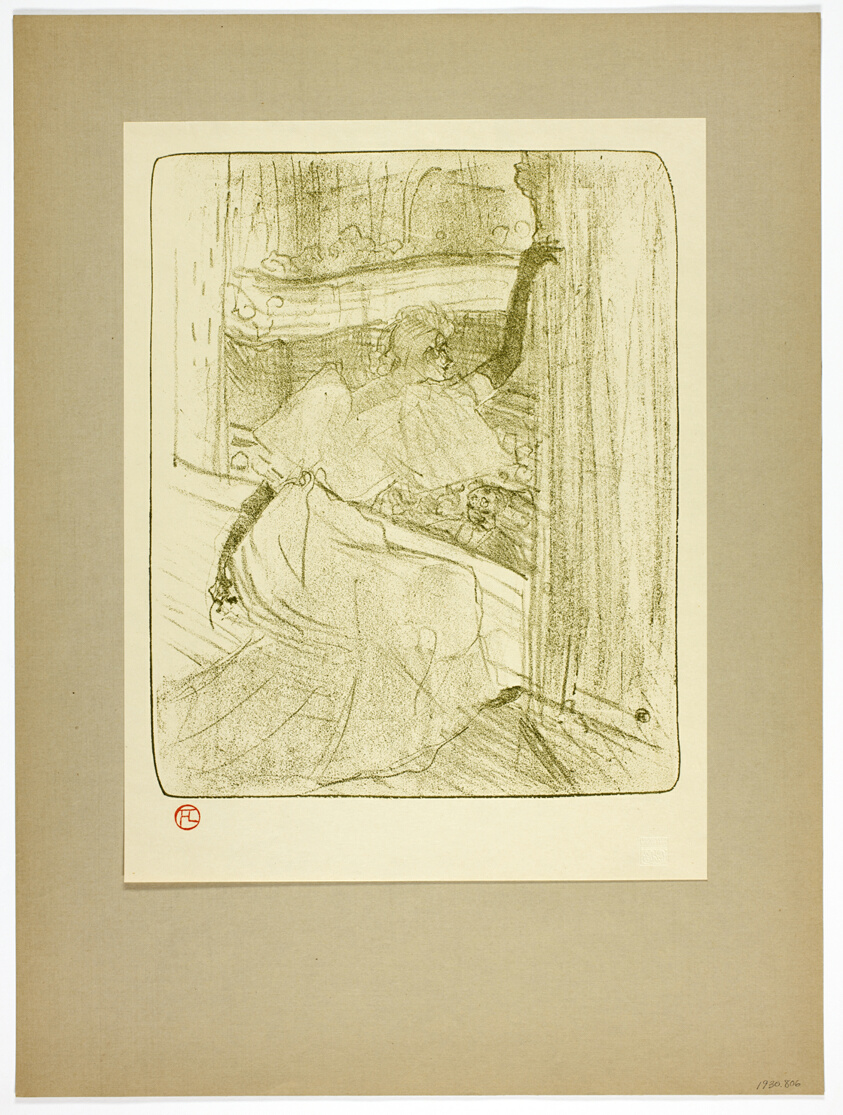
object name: Print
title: Taking a Bow, plate eight from Yvette Guilbert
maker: Henri de Toulouse-Lautrec (French, 1864-1901); printed by Westminster Press (English, 20th century); published by the Ernest Brown & Phillips (English, 20th century)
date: 1898, printed 1930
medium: Lithograph (crayon with scraper) in olive-green on cream wove paper hinged at top corners to gray-brown wove paper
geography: France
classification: lithograph; print; prints and drawing